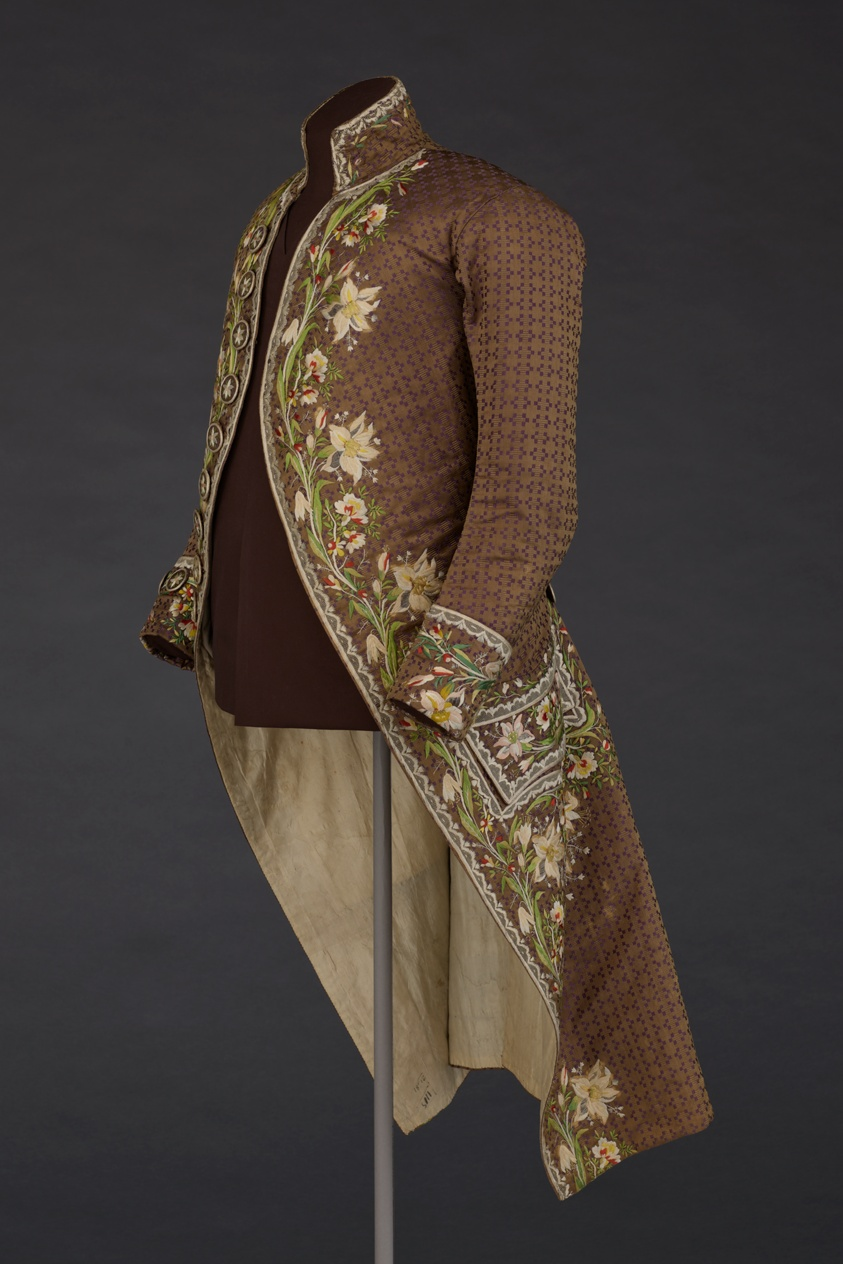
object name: Costume and Accessories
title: Man's Coat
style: 18th Century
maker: France, possibly Lyon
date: 1780s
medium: Silk, compound weave foundation; embroidered with silk threads in satin, stem and straight stitches; French knots, needle lace fillings, and slanted satin border block shading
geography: France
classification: textile; needlework (visual works); costume; dress (garment); clothing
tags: fashion, floral motifs, flowers